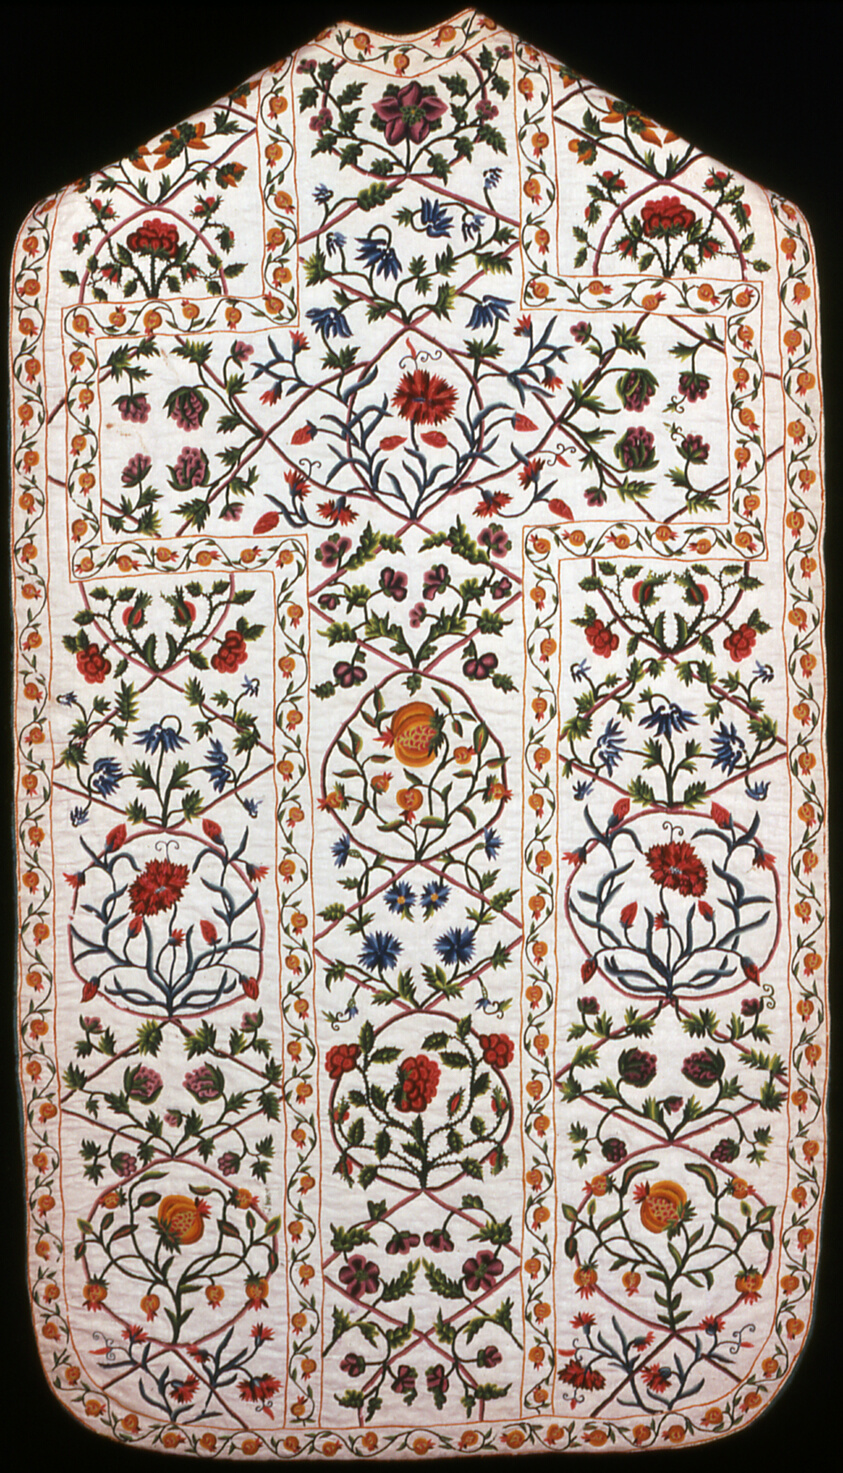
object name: Religious/Ritual Object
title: Chasuble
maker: France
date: c. 1750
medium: Wool, 2:2 twill weave; embroidered with wool in chain and running stitches; couching and French knots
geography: France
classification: textile; liturgical; needlework (visual works); ritual objects